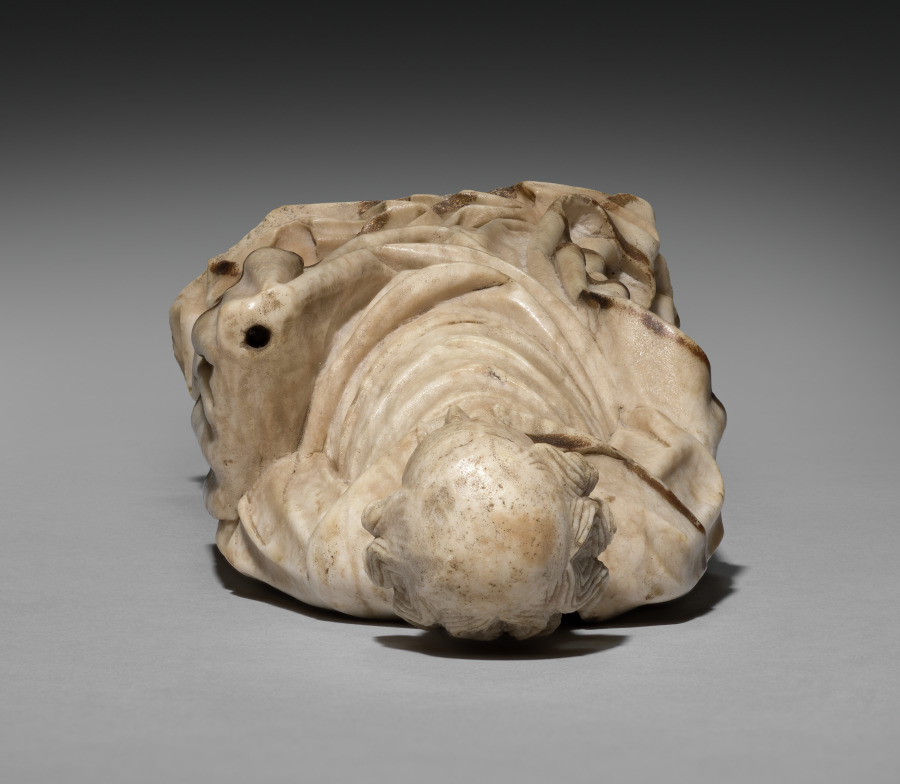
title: Standing Apostle (Saint Paul?)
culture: Southern Netherlands or Northern France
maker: Master of the Saint-Omer Apostles (Southern Netherlandish, active Bruges?)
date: c. 1430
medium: Alabaster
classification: Sculpture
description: This sculpture comes from an altarpiece in the cathedral of Saint Omer in northern France. Four other figures have been preserved there, and possibly one at the Metropolitan Museum in New York. The workshop was probably located in Bruges, in what is now Belgium. Sculpture was the leading art genre at that time. The specialized workshops obtained the stone alabaster from distant quarries, in this case from the area of Würzburg in Bavaria (Germany), to form it intricately and deliver it to customers in almost all of Europe.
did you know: Alabaster is very soft; after 20 minutes of treatment with water the surface will dissolve.